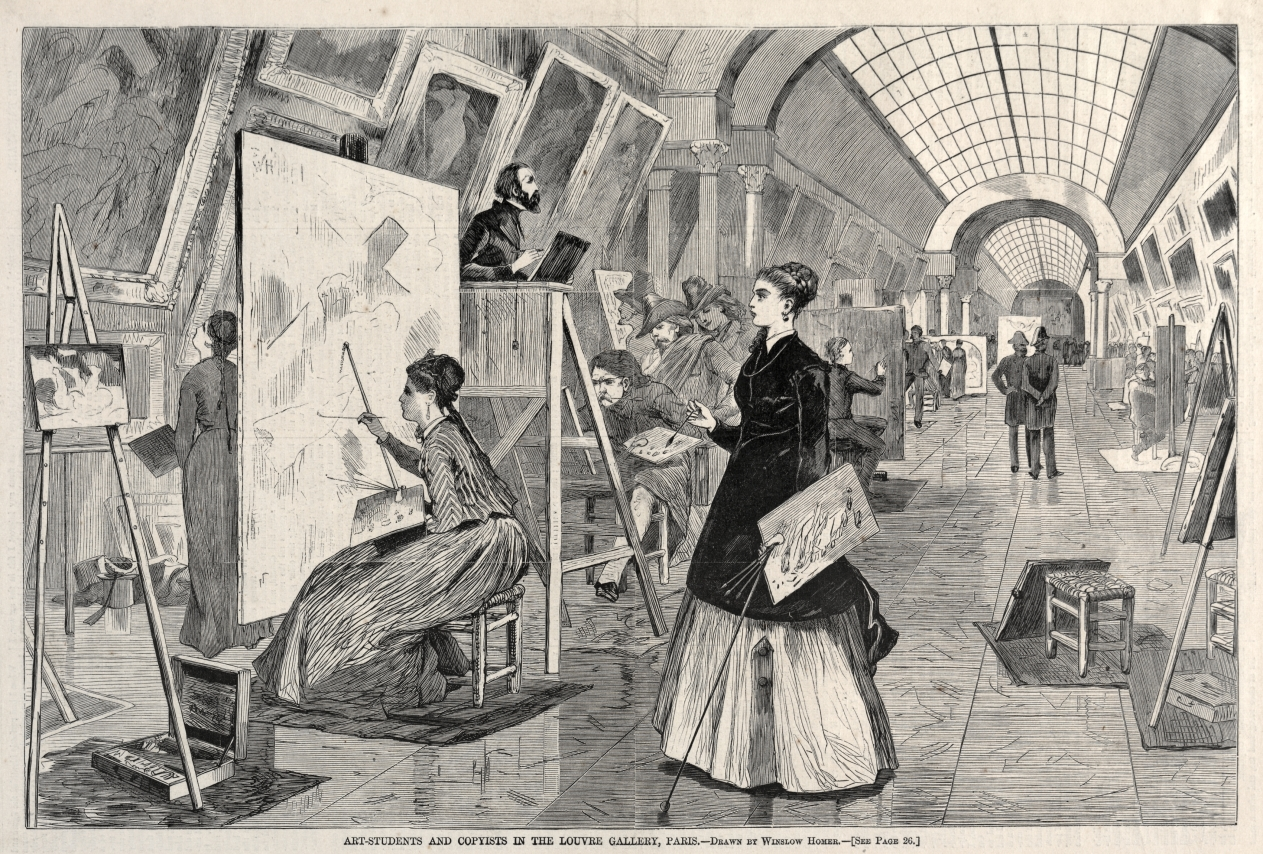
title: Art Students and Copyists in the Louvre Gallery, Paris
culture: America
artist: Winslow Homer (American, 1836–1910)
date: 1864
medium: wood engraving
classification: Print